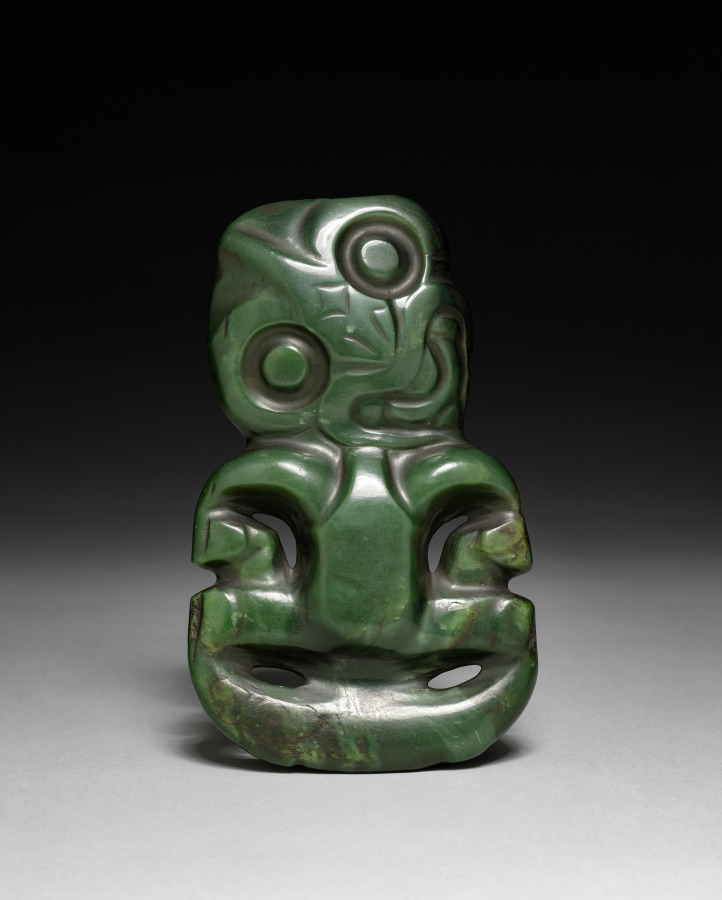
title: Neck Pendant (Hei-tiki)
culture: Pacific Islands, Polynesia, New Zealand, Māori people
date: 1800s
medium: Greenstone (pounamu) (nephrite?)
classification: Sculpture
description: Among the Māori, leaders are hereditary and imbued with mana, power and prestige that can be embodied and passed down in the artworks associated with them. Hei-tiki are among these treasured, mana-charged heirlooms, which connect the living to ancestors of the islands’ pre-European past. They may represent Hine-te-Iwaiwa, a legendary ancestress who is the exemplar of Māori womanhood and the patron of childbirth.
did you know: Hei-tiki may represent Hine-te-Iwaiwa, a legendary ancestress who is the exemplar of Māori womanhood.